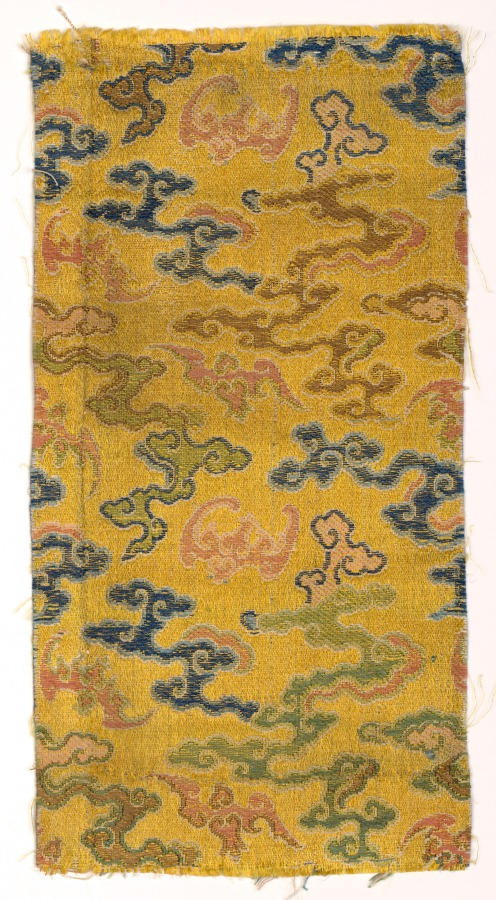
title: Fragment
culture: China, Qing dynasty (1644-1911)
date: 1700–1720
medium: Silk, diaper weave; satin ground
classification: Textile